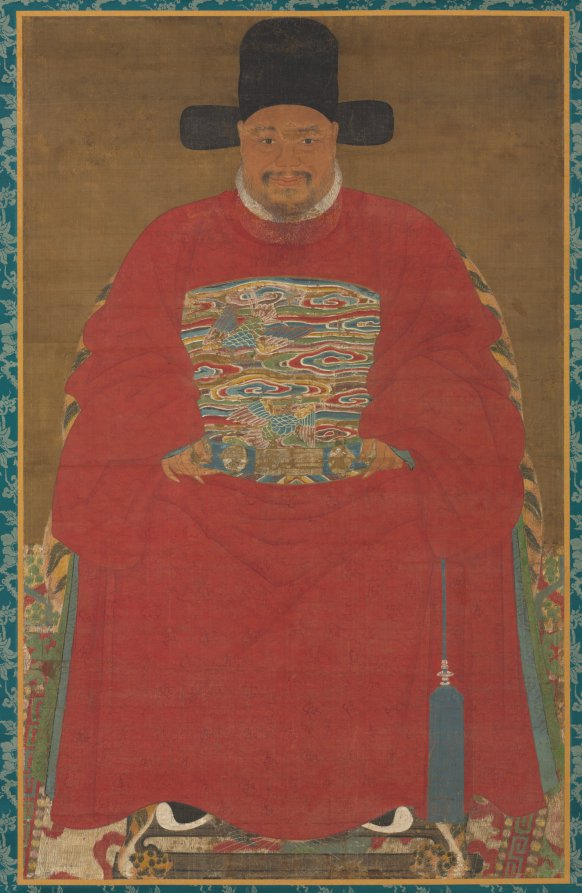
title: Portrait of an Official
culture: China, Ming dynasty (1368-1644) - Qing dynasty (1644-1911)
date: 1600s–1700s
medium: hanging scroll; ink and color on silk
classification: Painting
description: This official's portrait was done in the portrait painting style of the Ming dynasty.